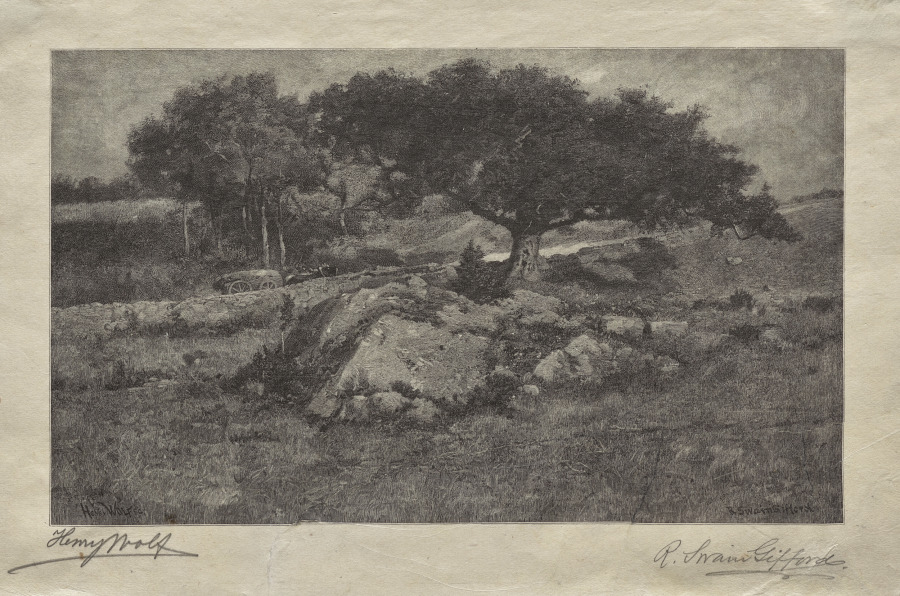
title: The Roadside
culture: America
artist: Henry Wolf (American, 1852–1916)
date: 1887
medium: wood engraving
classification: Print